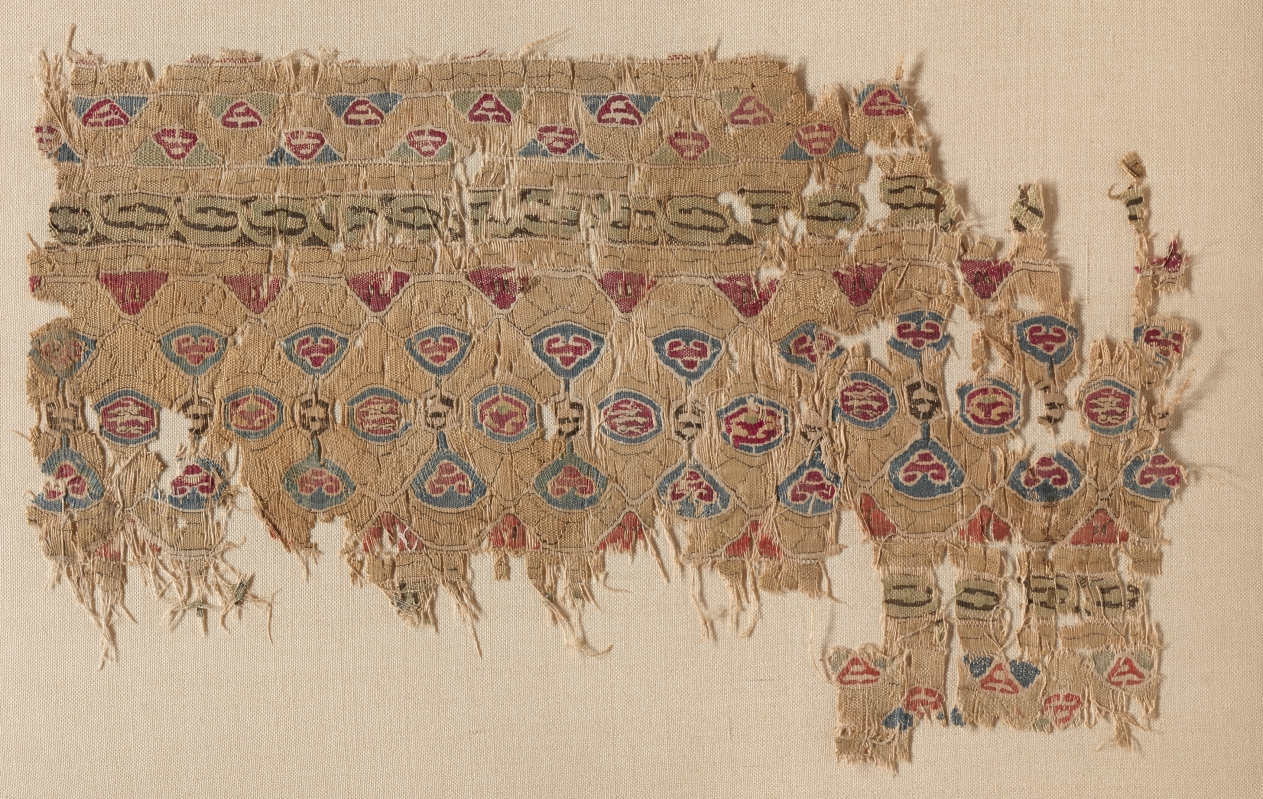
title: Fragment of a Tiraz-Style Textile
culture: Egypt, Fatimid period, 12th century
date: 1100s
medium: tapestry (originally inwoven in a tabby ground); linen and silk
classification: Textile